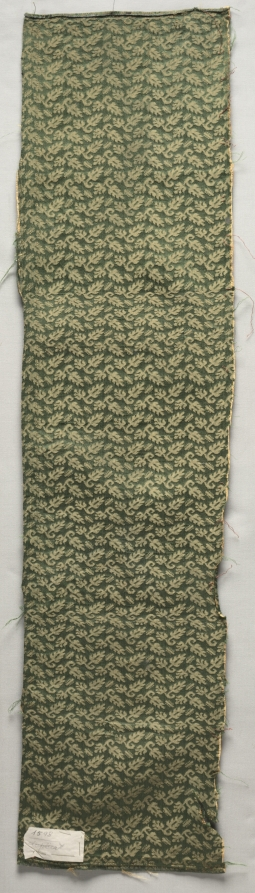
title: Silk Fragment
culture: Spain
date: 1600s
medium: damask: silk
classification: Textile